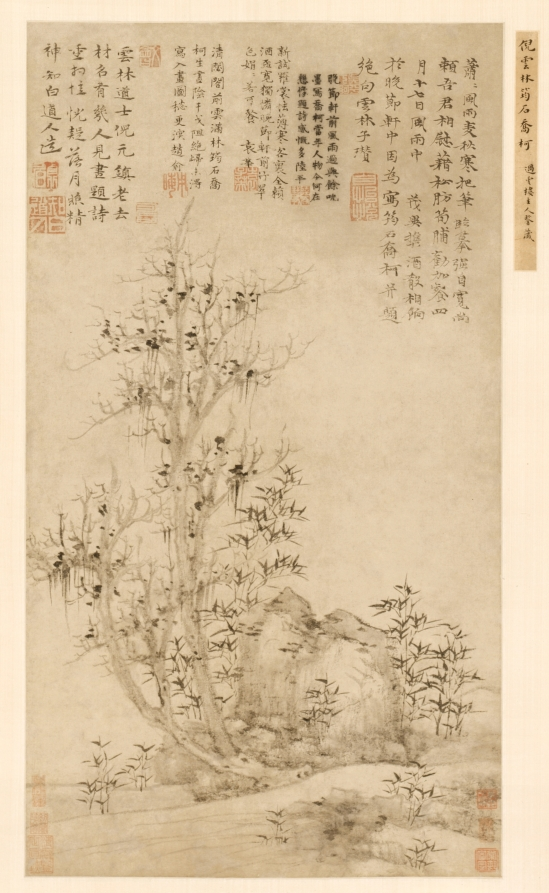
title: Bamboo, Rock, and Tall Tree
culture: China, Yuan dynasty (1271–1368)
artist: Ni Zan (Chinese, 1301–1374)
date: c. 1300s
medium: hanging scroll; ink on paper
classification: Painting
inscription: Artist's inscription, signature, and seal: Windy and rainy days - what a chilly wheat-harvesting season,/ With brush in hand, I fight depression by copying./ Fortunately, I can depend upon you, my friend, to send me consolation -/ "Pine-lard" wind, and meat with bamboo shoots that never fail to awaken appetite./ Yunlinzi, Zan. [seal] Ziyiyue.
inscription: 4 additional inscriptions and 14 additional seals: 1 poem and 3 seals, possibly of Chang Yü (1277–1350); 1 poem and 1 seal of Yüan Hua (1316–end of 14th c,); 1 poem and 2 seals of Lu P'ing (1438–1521); 1 seal of Liang Qingbiao 梁清標 (1620–1691); 1 poem and 1 seal of Chao Yü (1638–1713); 1 seal of ? Jen-lan (dates unknown); 2 seals of Gu Wenbin 顧文彬 (1811–1889); 1 seal of C. C. Wang 王季遷 (1907–2003); 2 seals unidentified.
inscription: Poem possibly by Chang Yü: The Daoist of the Cloudy Forest, Ni Yuanzhen,/ How many people can enjoy a fame in old age like yours?/ Seeing the painting, I wrote the poem in fond memories./ I feel as if I am bathed in the light of the fading moon/ Which shines on your spirit as always.